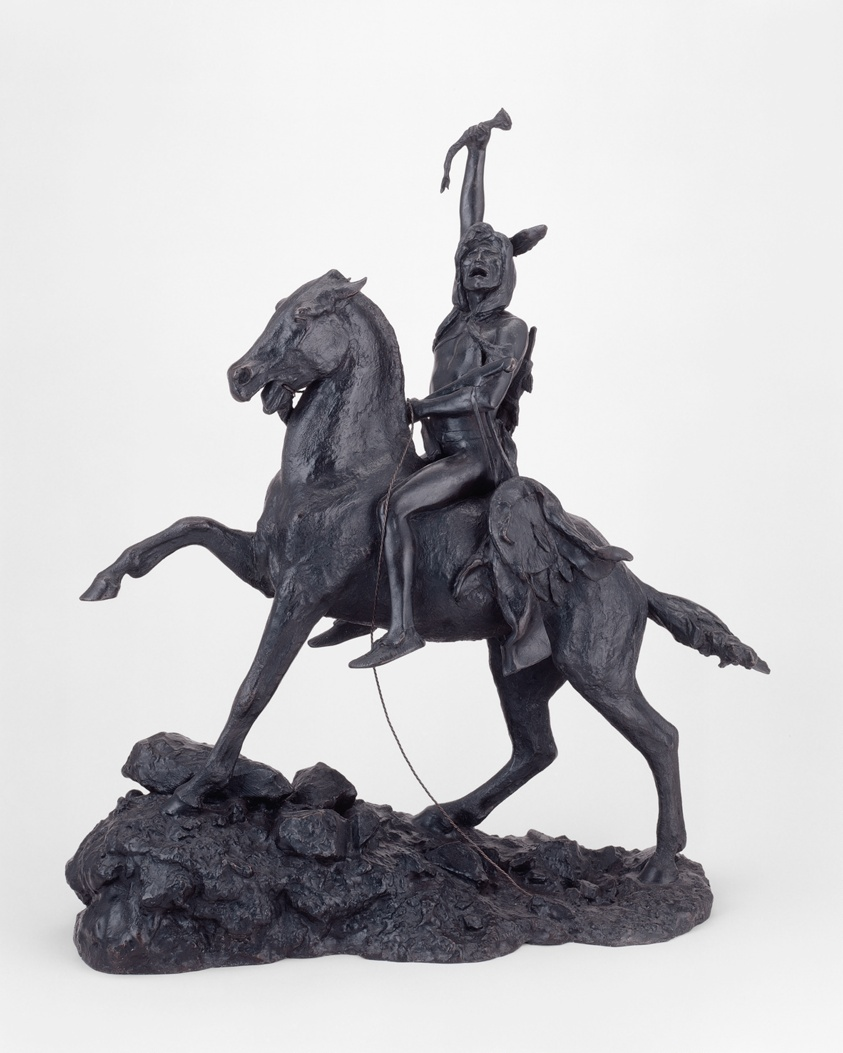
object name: Sculpture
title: The Scalp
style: 21st Century, American west, western art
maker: Frederic Remington (American, 1861–1909); Cast by Roman Bronze Works (American, founded 1897)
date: Modeled 1898, cast after 1916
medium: Bronze with black patina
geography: New York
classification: sculpture; american arts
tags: horse, native american, warriors